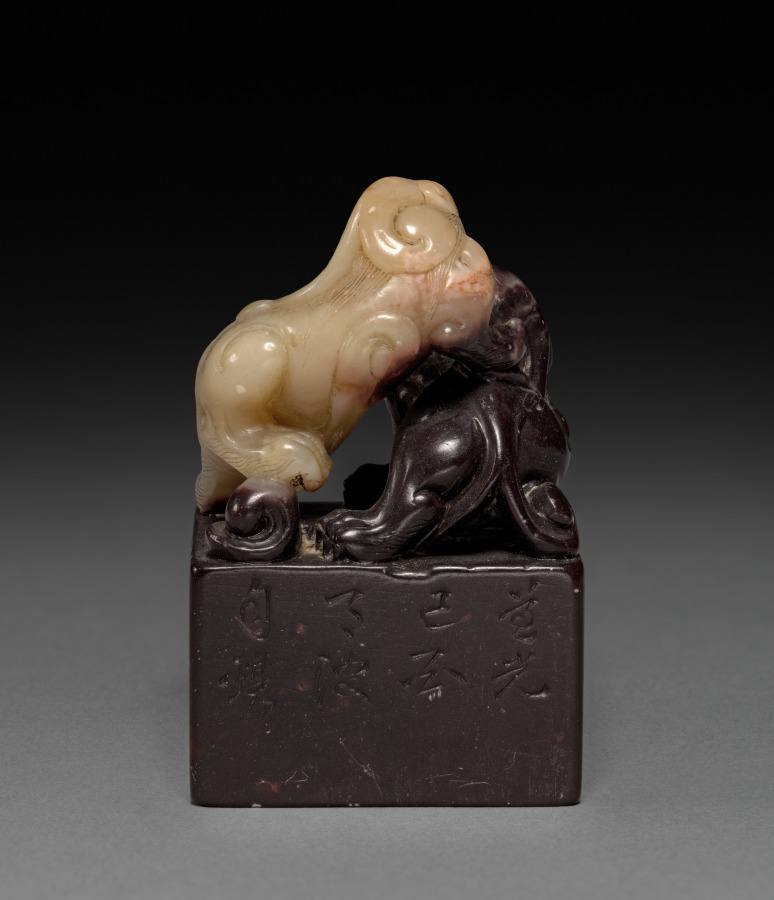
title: Seal with Two Qilin Playing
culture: China, Qing dynasty (1644-1911)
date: 1849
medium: onyx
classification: Stone